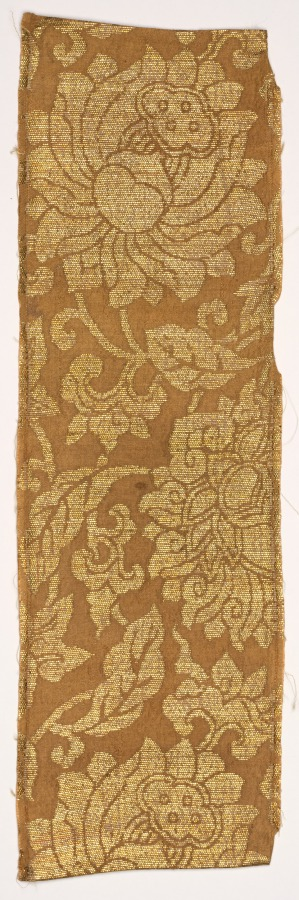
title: Textile Fragment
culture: Japan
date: 1800s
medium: silk, metallic thread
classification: Textile